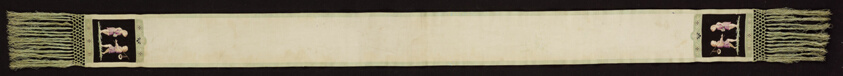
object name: Costume and Accessories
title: Sash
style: classical revival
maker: France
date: Late 18th/early 19th century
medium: Silk, plain weave with plain interlacings of secondary binding warps and supplementary brocading wefts; applied knotted silk fringe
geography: France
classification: textile; weaving; costume